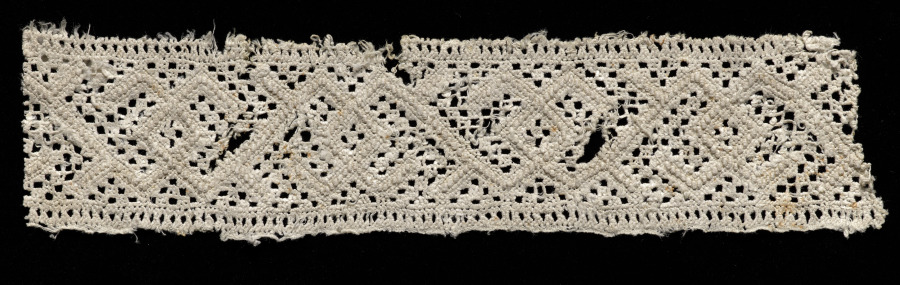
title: Lace fragment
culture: Italy, Venice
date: 1500s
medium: Linen: needle lace (drawnwork); punto riccio embroidery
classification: Lace